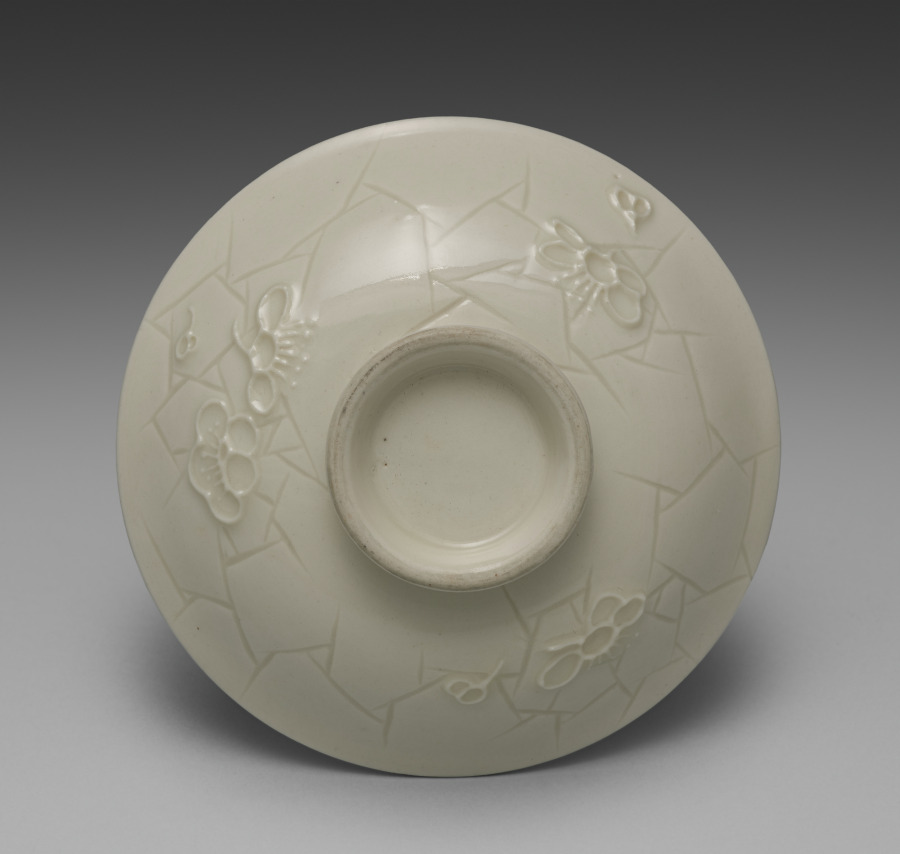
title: Cover for a Bowl from Dining Set with Plum Blossoms and Cracked-Ice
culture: Japan, Meiji period (1868–1912)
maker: Seifū Yohei II (Japanese, 1844–1878)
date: c. 1875–78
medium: Porcelain with molded designs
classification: Ceramic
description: Each item in this set has a delicate low-relief design of flowering plum branches over scattered, intersecting lines meant to resemble the cracked-ice surface of a frozen body of water and is signed on the base in gold pigment. While Yohei II produced many fine works in underglaze blue, like those produced by Kiyomizu Shichibei, he also made works in quite different styles later in his career, from the early 1870 s. In 1873, he was appointed purveyor to the Industrial Center of Kyoto Prefecture, a designation associated with Kyoto’s efforts to reach an international market through the port of Kobe; and from 1875 until his death, he was involved in national-level projects to present Japanese ceramics across the world. It was during this period that Yohei III was apprenticed to Yohei II, and it has been suggested that this set may in fact be an early example of Yohei III’s work, which he signed with his teacher’s name. Decorated with flowers resembling Japanese textile motifs, the set calls to mind the design of Yohei II’s pair of vases with plum blossoms in the Victoria and Albert Museum. Here, the elaborate trees created for a formal public exhibition setting have been translated into the approachable blossoms of the genteel domestic environment. While the designs are consistent across the pieces, each raised flower petal and pistil and each incised line in the ice was done by hand, so the cups, bowls, and dishes are similar yet unique. The bottoms of two boxes once identified the set’s owner, but the information has been deliberately obscured with black ink. However, inscriptions still visible appear to indicate two occasions, once at the end of July 1886 , and once again in June 1916 , when parts of the set were requested from Hokura in Niigata Prefecture. The location corresponds to a neighborhood in the present-day city of Jōetsu. The surname Tsuji 辻 also appears on a paper tag affixed to one of the box cloths. Future research may possibly reveal more about their provenance. A vase by Yohei III in a private collection combines the formal grandeur of the Yohei II vases in the Victoria and Albert Museum with the gentler design of this dining set, placing flowering plum trees against soft, scalloped-edge clouds resembling those in golden screens.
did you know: The dining wares have a creamy white coloration that the four boxes containing them identify as Korean in style.